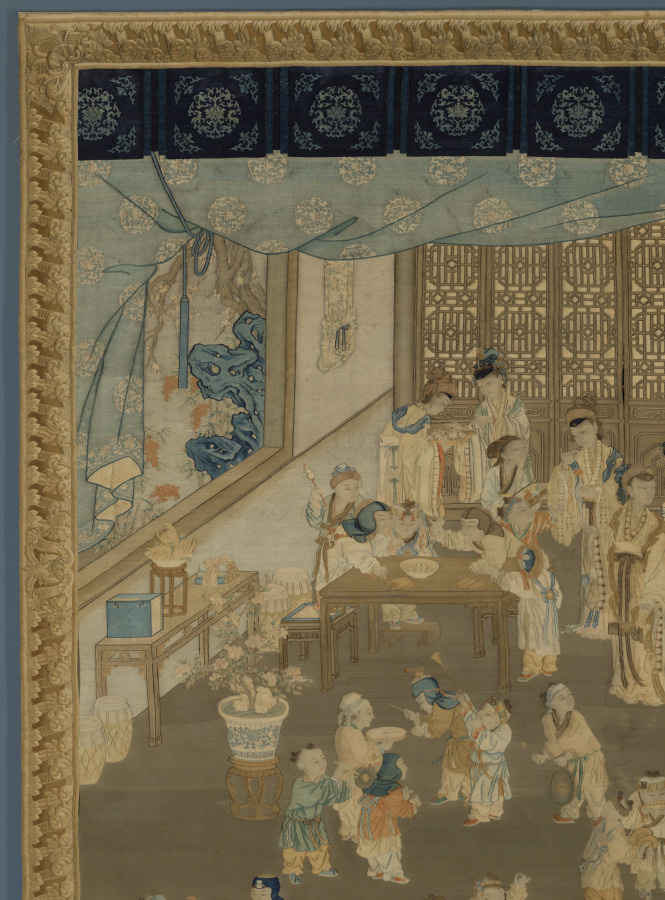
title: Family Gathering on New Year's Morning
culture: China, Qing dynasty (1644-1911)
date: late 1760s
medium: Silk and wool: tapestry weave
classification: Tapestry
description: This European-style tapestry depicts a family gathering, in a woven Western picture frame, that presumably once furnished the Hall of Cultivating the Mind (Yangxin dian) in the Forbidden City. The tapestry employs Western perspective and shading combined with the traditional Chinese subject of a family gathering in a palace, including motifs expressing wishes for good fortune and for a peaceful reign. In 1766, six French tapestries had been presented to the Chinese court. The Qianlong emperor was so intrigued that he commissioned tapestries in the French style from Suzhou. Records mention an imperial order for tapestries in the Western style, such as this one, in 1769, 1770, and 1775.